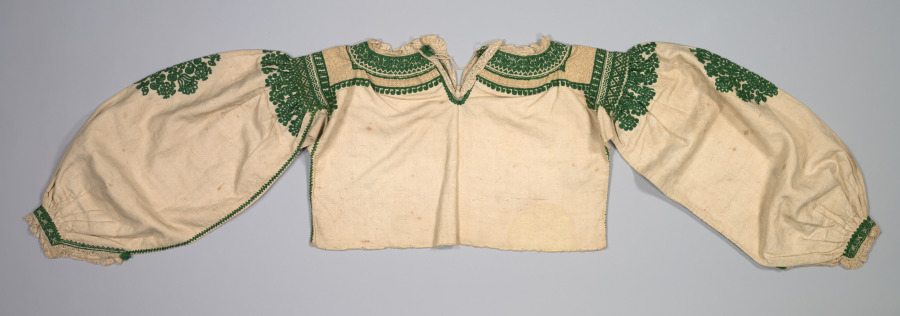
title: Blouse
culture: Spain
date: 1600s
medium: plain weave cotton(?) or linen(?) with embroidery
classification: Garment